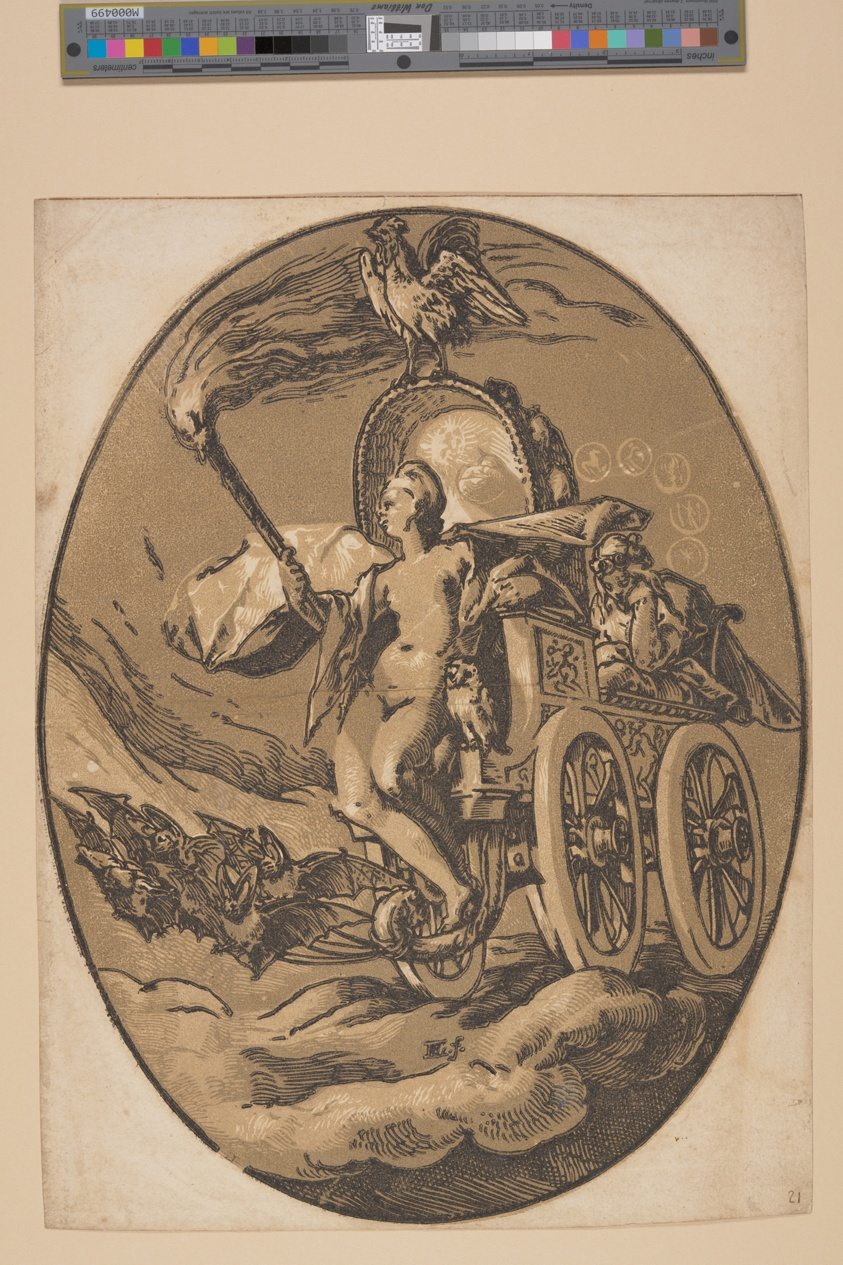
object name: Print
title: Nox, from The Deities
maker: Hendrick Goltzius (Dutch, 1558–1617)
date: 1588/90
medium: Chiaroscuro woodcut from three blocks in two shades of beige-gray on ivory laid paper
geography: Netherlands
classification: print; paper; prints and drawing; woodcut